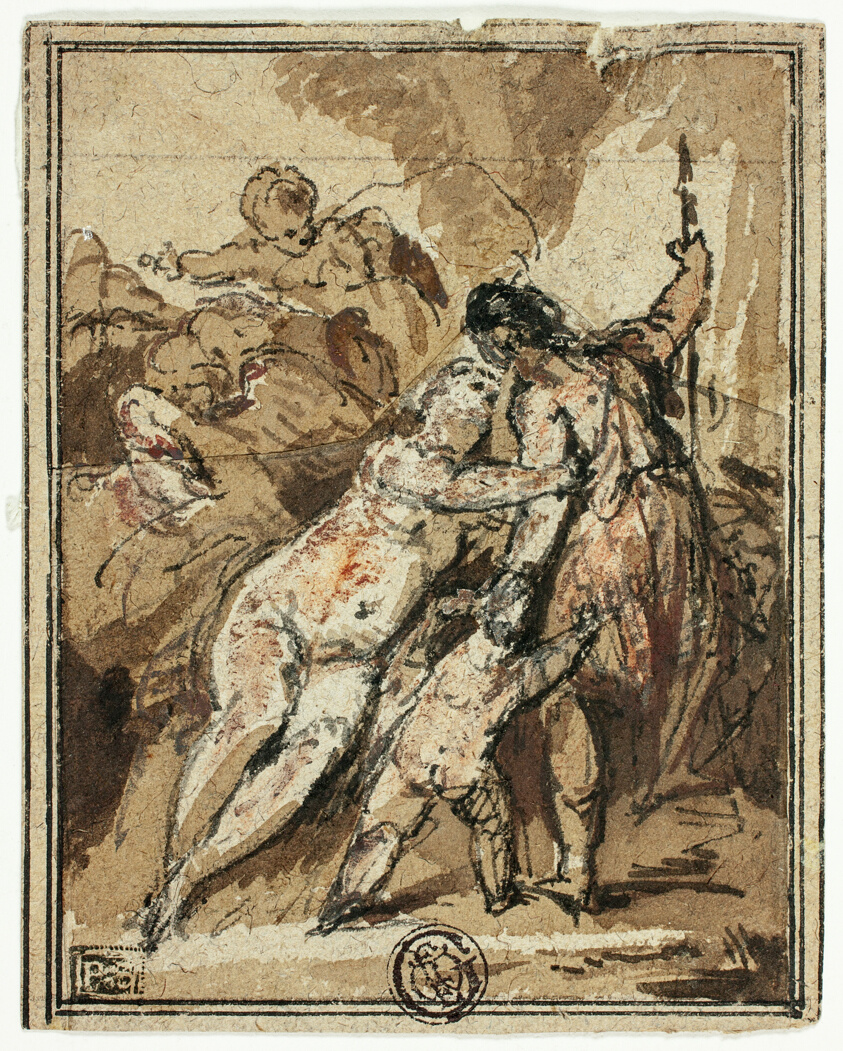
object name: Drawing and Watercolor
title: Venus Trying to Retain Adonis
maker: Attributed to Jacob de Wit (Dutch, 1695-1754); or an unknown Flemish artist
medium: Pen and brown ink, with brush and brown wash, heightened with lead white (discolored), over red chalk, on buff laid paper, pieced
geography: Flanders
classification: pen and ink drawings; drawings (visual works); prints and drawing